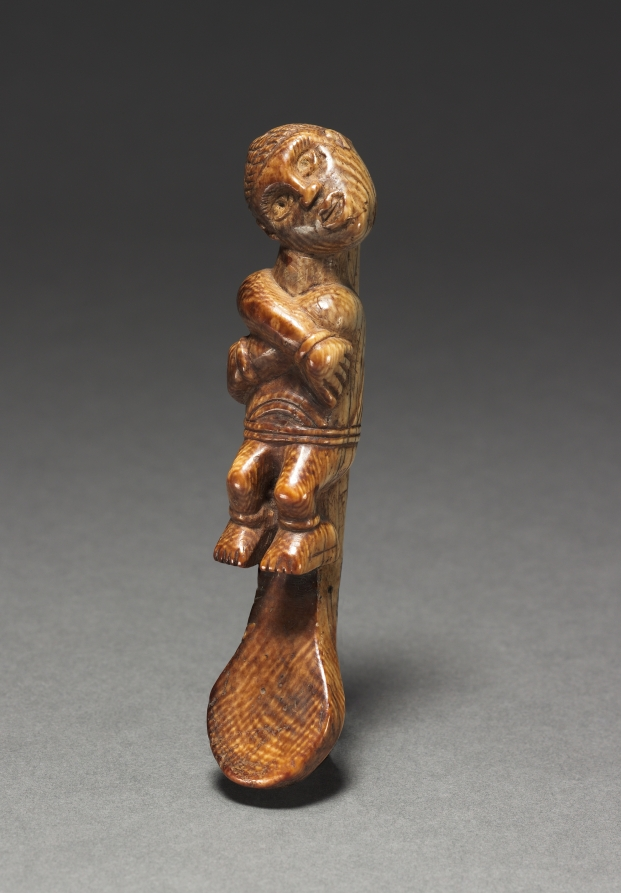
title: Female Figurine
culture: Africa, Central Africa, Democratic Republic of Congo (most likely), Cabinda, or Republic of the Congo, probably Yombe-style maker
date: late 1800s–early 1900s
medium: Ivory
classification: Sculpture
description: This female figurine may be a fragment of a spoon or spatula, but is not confirmed. Iconography of the human image is common in the art of Kongo-speaking peoples, however, this object’s function or purpose is unknown. The position of the arms has been interpreted as that of a bound prisoner while the positioning of the head represents a broken neck or severed head, thus identifying as a sacrificial victim.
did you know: This object is believed to be a portion of a spoon or a spatula. The position of the prisoner is believed to be a sacrificial victim.